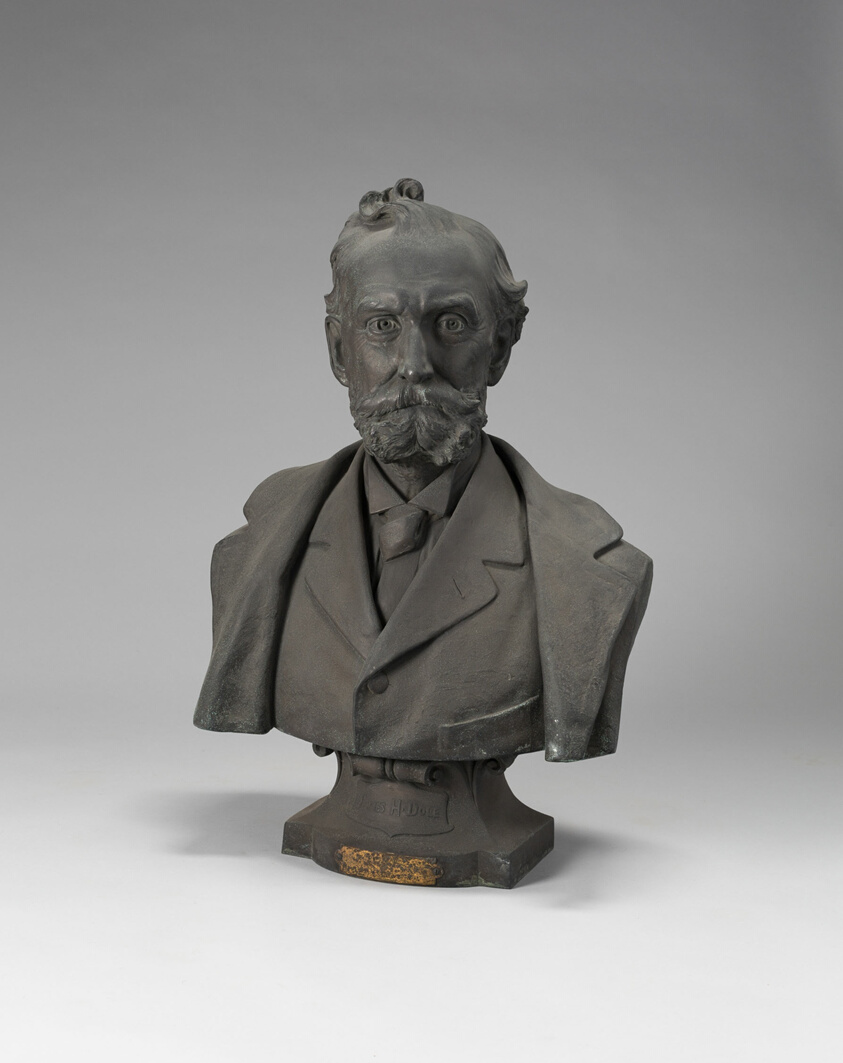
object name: Sculpture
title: James H. Dole (1824-1902)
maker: Johannes Sophus Gelert (American, born Denmark, 1852–1923)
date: 1894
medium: Bronze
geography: United States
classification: sculpture; american arts